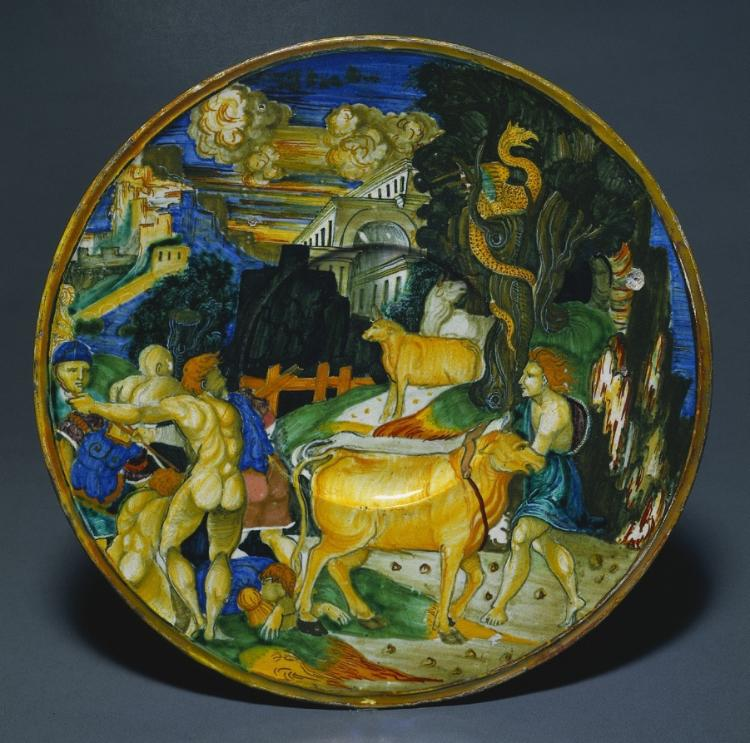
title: Plate Depicting the Myth of Cadmus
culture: Italy, Urbino region, Gubbio, 16th century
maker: circle of Maestro Giorgio Andreoli (Italian, 1465?–1553)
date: 1526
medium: tin-glazed earthenware with gold lustre (maiolica)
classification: Ceramic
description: Obeying the command of an oracle, Cadmus followed a cow to Boeotia, or “oxen-land.” There he slayed a dragon and buried its teeth in the ground. From the teeth grew a crop of warriors who fought each other until only the strongest five remained. Cadmus invited the victors to join him, and together they built the city of Thebes, where the mythological hero, Hercules (or Herakles) was later born.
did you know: This plate depicts multiple scenes from the Greek myth of Cadmus.